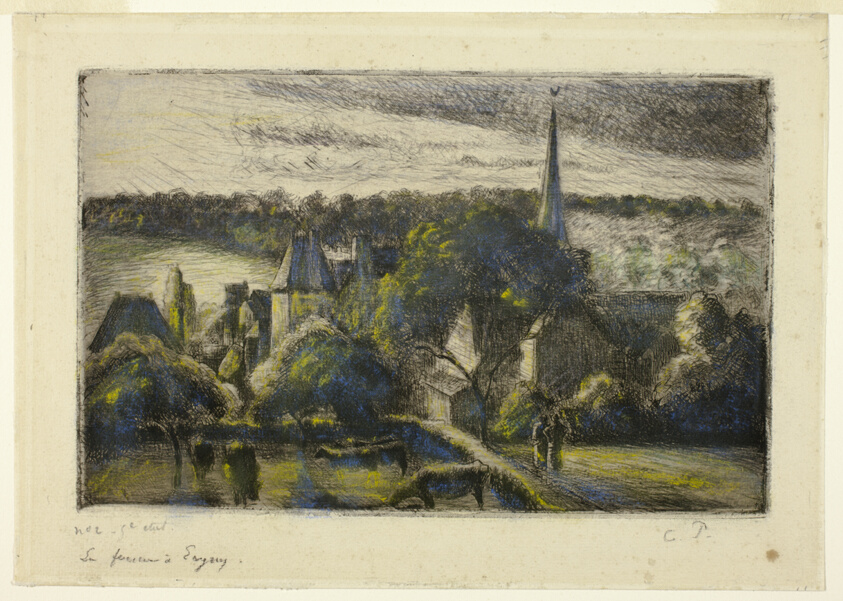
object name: Print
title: Church and Farm at Éragny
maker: Camille Pissarro (French, 1830-1903)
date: 1895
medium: Etching and drypoint in black, with pastel, on buff laid paper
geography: France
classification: etching; print; prints and drawing